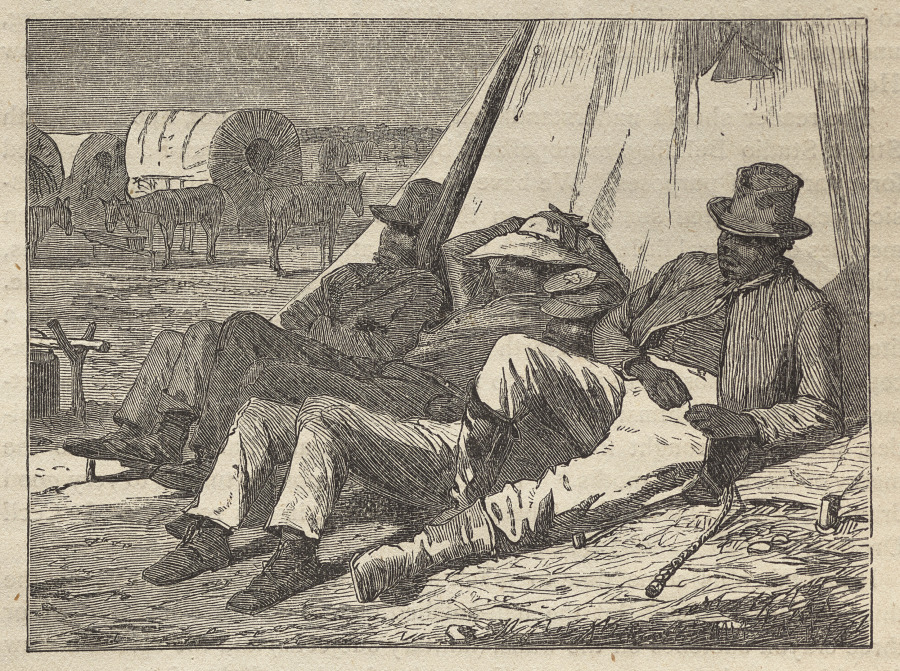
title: The Bright Side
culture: America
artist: Winslow Homer (American, 1836–1910)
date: 1866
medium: wood engraving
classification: Print